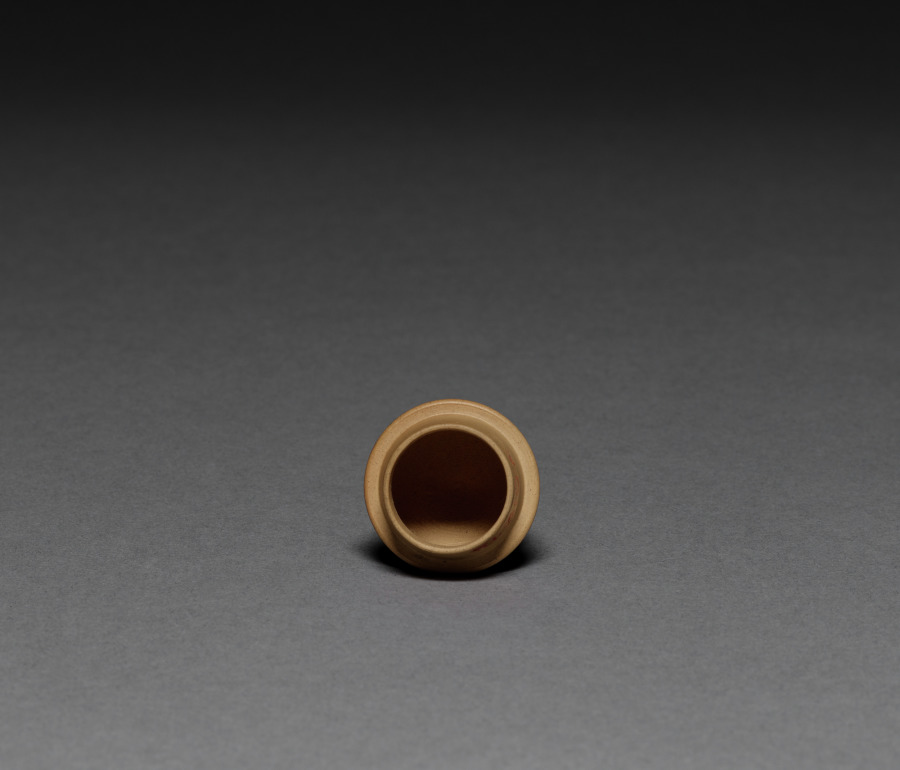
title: Caneware Jar (lid)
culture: England, Staffordshire, 18th century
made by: Wedgwood Factory (British)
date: c. 1795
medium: stoneware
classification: Ceramic